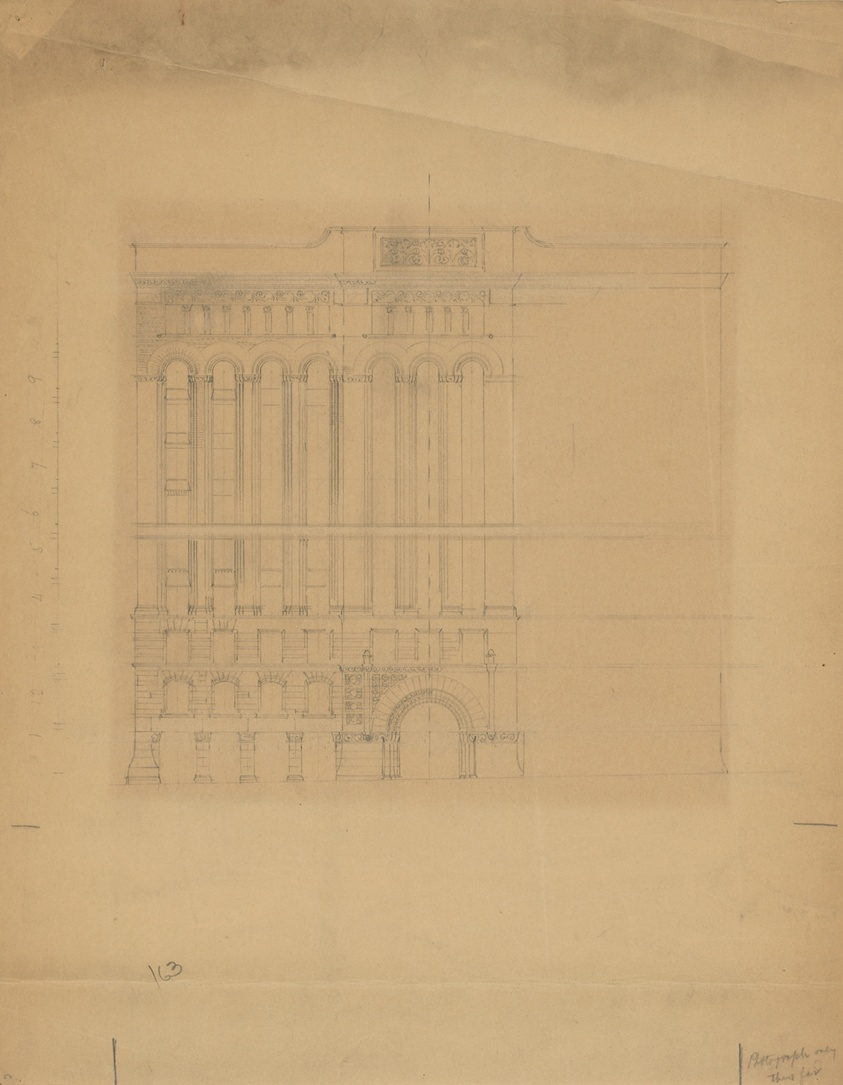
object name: Architectural Drawing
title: Mills Building, San Francisco, California, Design Sketch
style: 19th century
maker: Burnham & Root; American, 1873–1891; John Wellborn Root; American, 1850–1891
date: c. 1890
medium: Pencil on manila drawing paper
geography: United States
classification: architectural drawing; architectural detail; architecture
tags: design sketch, architecture